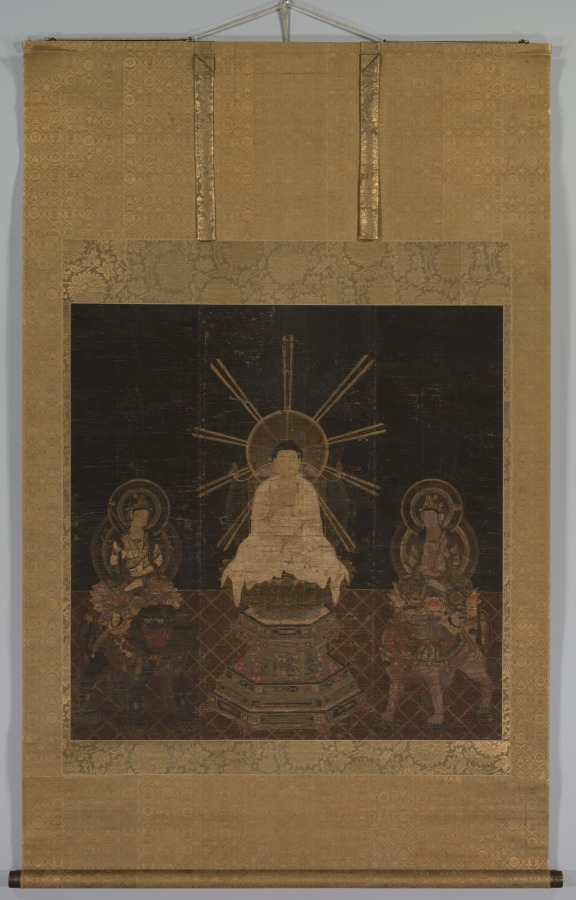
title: Shakyamuni Triad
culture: Japan, Kamakura period (1185–1333)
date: c. 1200–1333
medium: hanging scroll; ink, color, gold and cut-gold on silk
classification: Painting